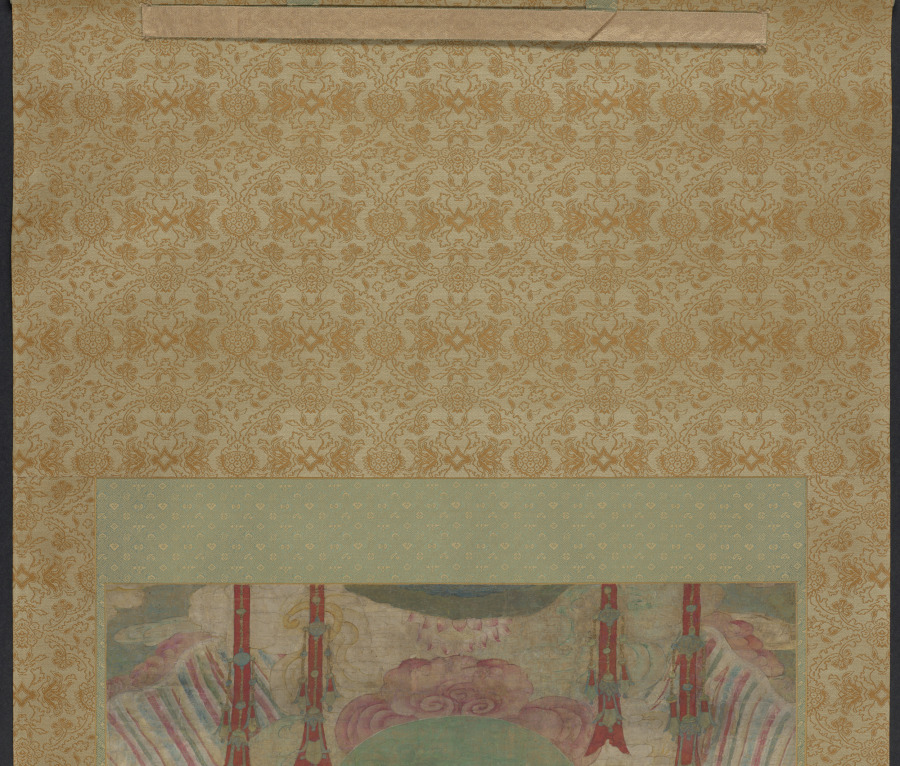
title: Seated Amitābha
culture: Chinese, Ming dynasty (1368-1644)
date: late 1500s–early 1600s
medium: hanging scroll; ink and color on silk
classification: Painting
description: This magnificent Buddha, called Amitābha (literally, “infinite light”) is seated on a lotus pedestal with both palms facing up over crossed legs, suggesting that it is in deep meditation. In contrast to the richly ornamented throne on which the Buddha is seated, the figure itself is devoid of any jewelry or decorative attributes, emphasizing its enlightened status and detachment from worldly affairs. The lion head in the center of the pedestal is a motif from Central Asia, which can also be seen in the halo or nimbus of Chinese Buddhist stone steles.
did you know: Originally, this scroll was acquired by the museum as a Korean work, but has now been tentatively reattributed as Ming period Chinese.